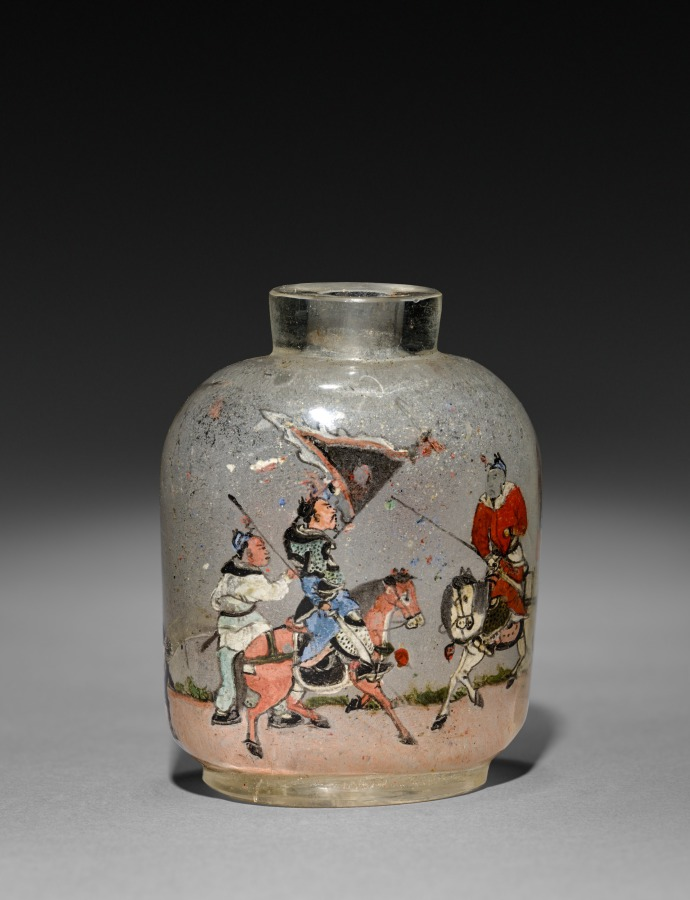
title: Snuff Bottle with Stopper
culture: China, Qing dynasty (1644-1911)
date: 1800s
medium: glass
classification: Glass